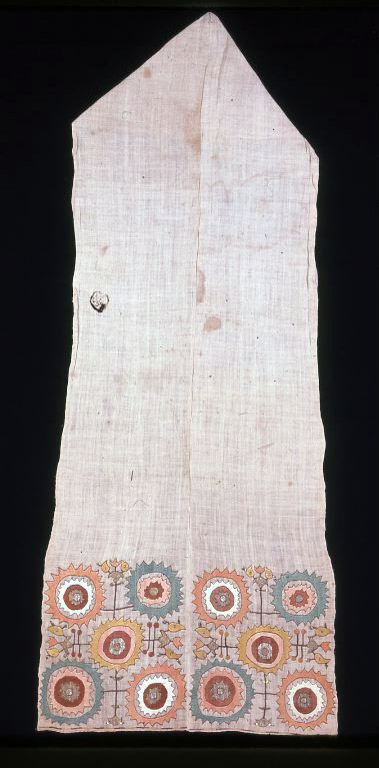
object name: Textile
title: Headdress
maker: Greece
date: 19th century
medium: Linen, plain weave; embroidered with silk floss, gilt- and silvered-metal-strip-wrapped silk, and gilt-metal-strip in double running, twined double running, and satin stitches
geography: Greece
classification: textile; needlework (visual works)